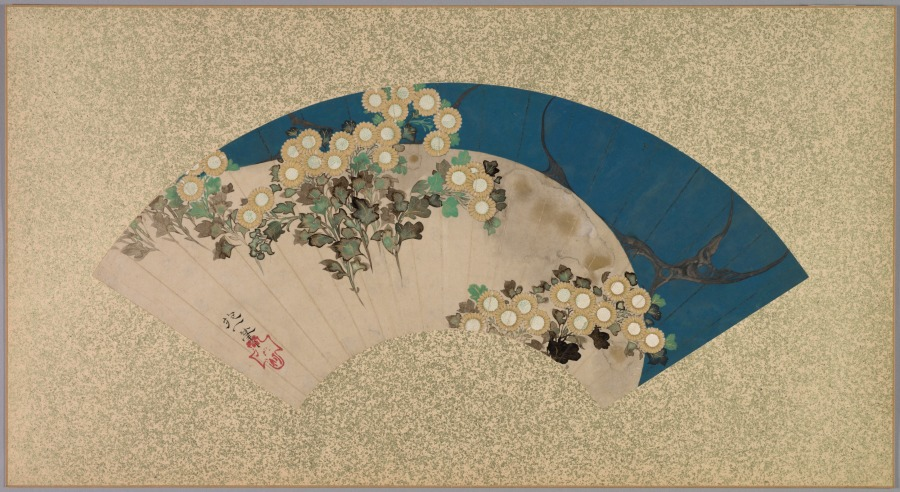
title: Chrysanthemums by the Water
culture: Japan, Edo period (1615–1868)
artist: Sakai Hōitsu (Japanese, 1761–1828)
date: 1761–1828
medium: fan painting: ink, color, and gold on paper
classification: Painting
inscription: signature at left: " Hoitsu painted," and seal: "oson."